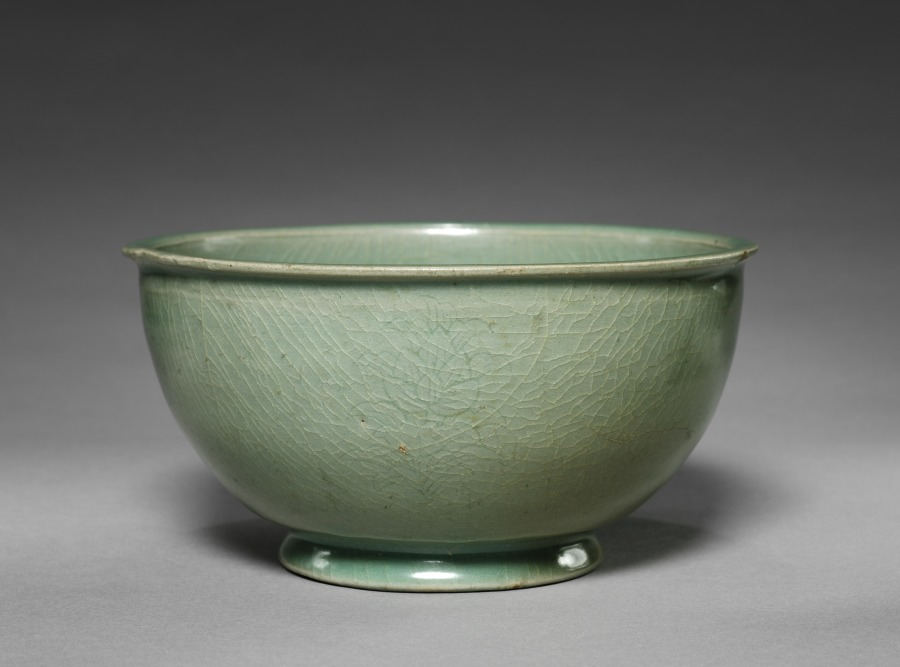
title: Bowl and Saucer with Incised Lotus and Peony Design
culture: Korea, Goryeo dynasty (918–1392)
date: 1100s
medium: pottery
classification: Ceramic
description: As early as the seventh century, the practice of drinking tea and wine became an important part of elite culture in Korea. Elites of the Goryeo period commissioned a variety of types of utensils and vessels including this saucer paired with a large bowl, to make their drinking experience more exciting.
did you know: This type of celadon bowl was modeled after Ru ware of northern China. Xu Jing (1091-1153), the Chinese official who visited Korea in 1123, called the Korean celadon ware as the “new kiln ware of Ru-zhou.”